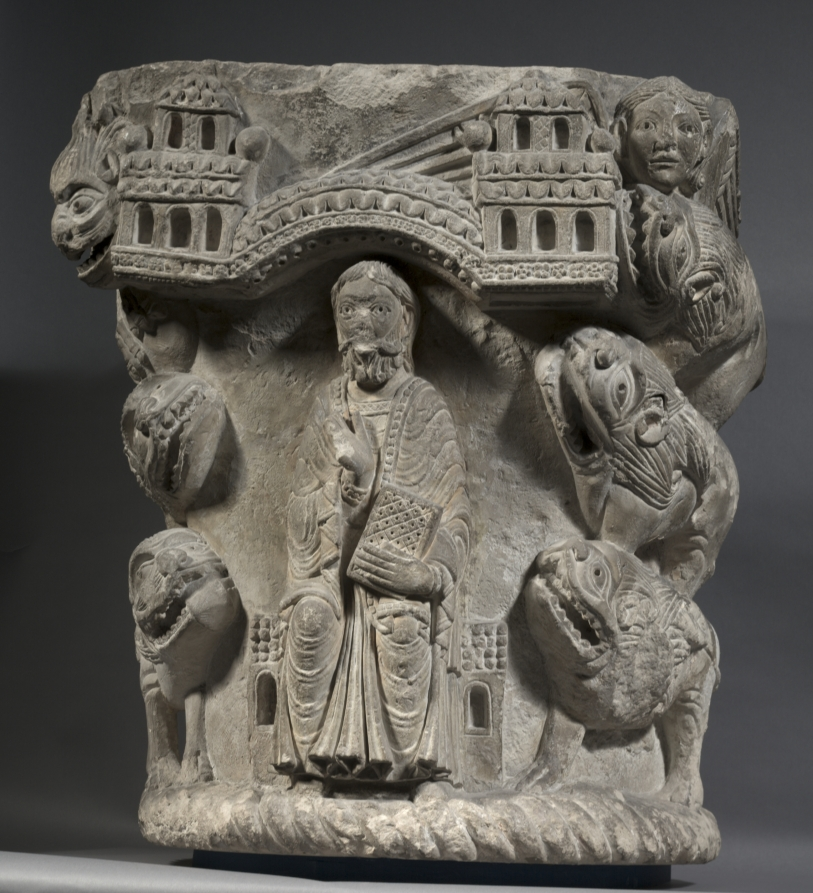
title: Daniel in the Lion's Den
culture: France, Saint-Aignan-sur-Cher, 12th century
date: c. 1125–50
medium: limestone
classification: Sculpture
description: According to the Old Testament, Daniel was cast into a lion’s den as punishment for his belief in a single god, but he was miraculously delivered from harm on account of his faith. This story is related here, with Daniel flanked by lions and the angel sent by God to save him. Together with other decorated capitals, this imposing work of Romanesque sculpture once decorated the interior of the church of Saint-Aignan-sur-Cher, a city in central France.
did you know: During the 12th century, churches used images to teach the faithful who were illiterate. While Daniel lived before Jesus, he is depicted holding a bible, alluding to the continuity between the Old and New Testaments.